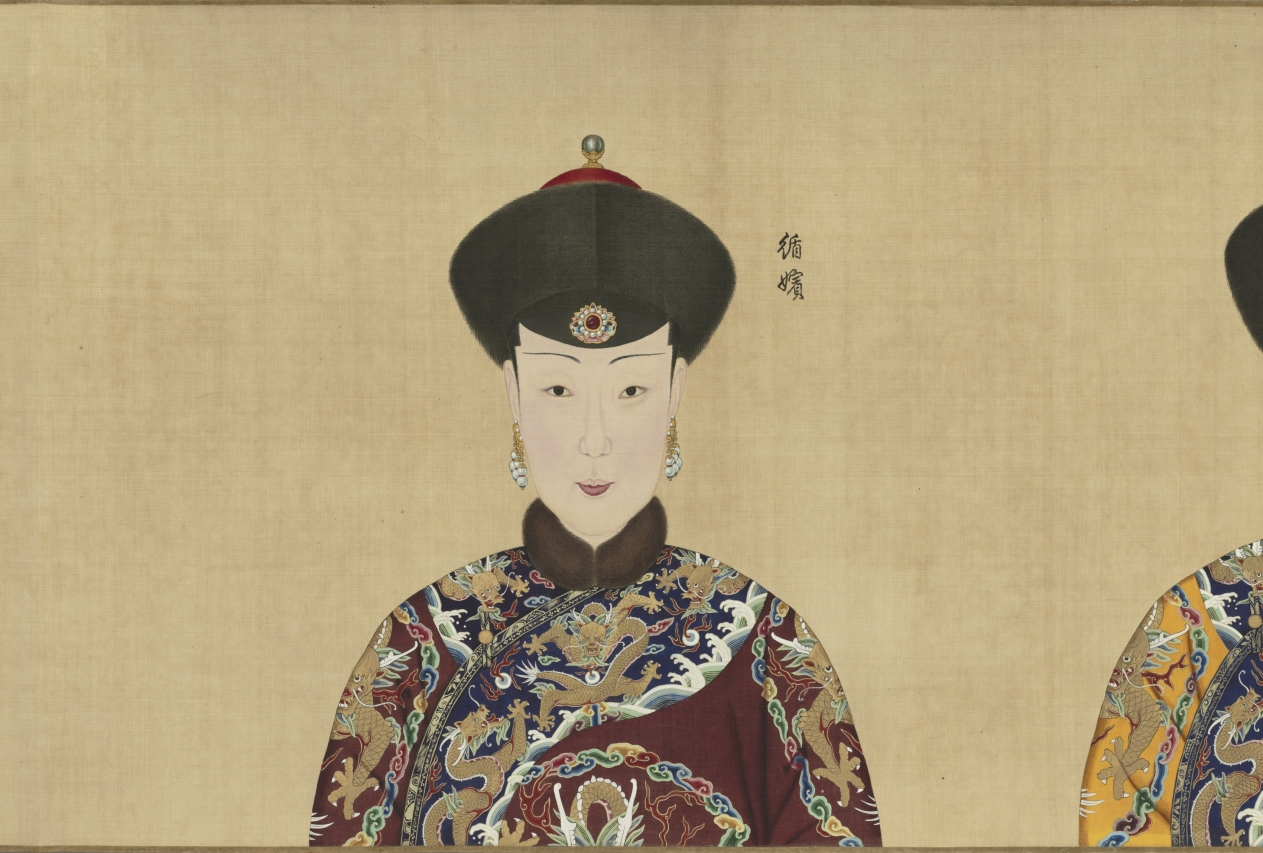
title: Portraits of the Qianlong Emperor and His Twelve Consorts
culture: China, Qing dynasty (1644–1911), Qianlong reign (1736–95)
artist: Giuseppe Castiglione (Italian, 1688–1766)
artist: and others (Chinese)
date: 1736–70s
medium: Handscroll; ink and color on silk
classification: Painting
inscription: 9 seals of the Qianlong emperor (r. 1736–95).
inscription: The eighth month, first year of Qianlong [1736] 乾隆元年八月吉日. The Empress (Xiaoxian) 皇后 (1712–1748), The Guifei (Huixian) 貴妃 (?-–1745), Chunfei 純妃 (1713–1760), Jiafei 嘉妃 (?–1755), Lingfei 令妃 (1727–1775), Shufei 舒妃 (1728–1777), Qingbin 慶嬪 (1724–1774), Yingbin 穎嬪 (1731–1800), Xinbin 忻嬪 (?–1764), Dunfei 惇妃 (1746–1806), Xunfei 順妃 (1749–1788), Shunbin 循嬪 (?–1797).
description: This portrait shows the Qianlong emperor at 26, in the first year of his reign. His likeness is followed by portraits of the empress and eleven consorts. Their portraits document the appearances of the court women around the time when they received their respective imperial titles, which occurred at different stages of the emperor's life. The first three portraits were done by the Jesuit (Roman Catholic) missionary artist Giuseppe Castiglione, whereas the later ones were by Chinese court painters. Formal portraiture contributed to the affirmation of status and construction of role and identity. This scroll served as both familial documentation and a "mind picture" of the Qianlong emperor, suggesting that his constructed image of emperorship was inseparable from concepts of self and family. It was stored in a carved red lacquer box bearing the original painting title Mind Picture of a Well-Governed and Tranquil Reign (see CMA 1969.32).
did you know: Lingfei 令妃 (1727–1775), the first consort depicted in the maroon or “incense-colored" 香色 robe, was the mother of six of Qianlong’s children, including the future Emperor Jiaqing.